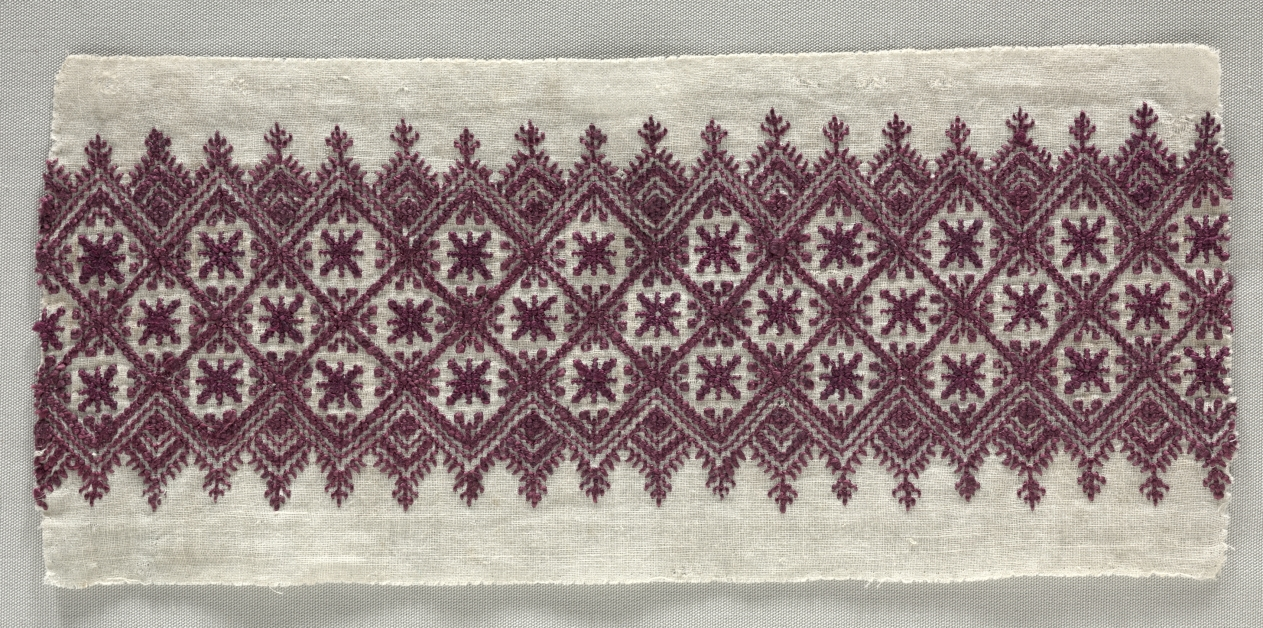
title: Fragment of a furnishing textile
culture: Africa, North Africa, Morocco, Fes, Moroccan embroiderer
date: 1700s–1800s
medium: Cotton, silk, dye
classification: Embroidery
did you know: Myrta Leonora Jones, the donor of this work, was a women’s rights activist in Cleveland in the early 20th century.